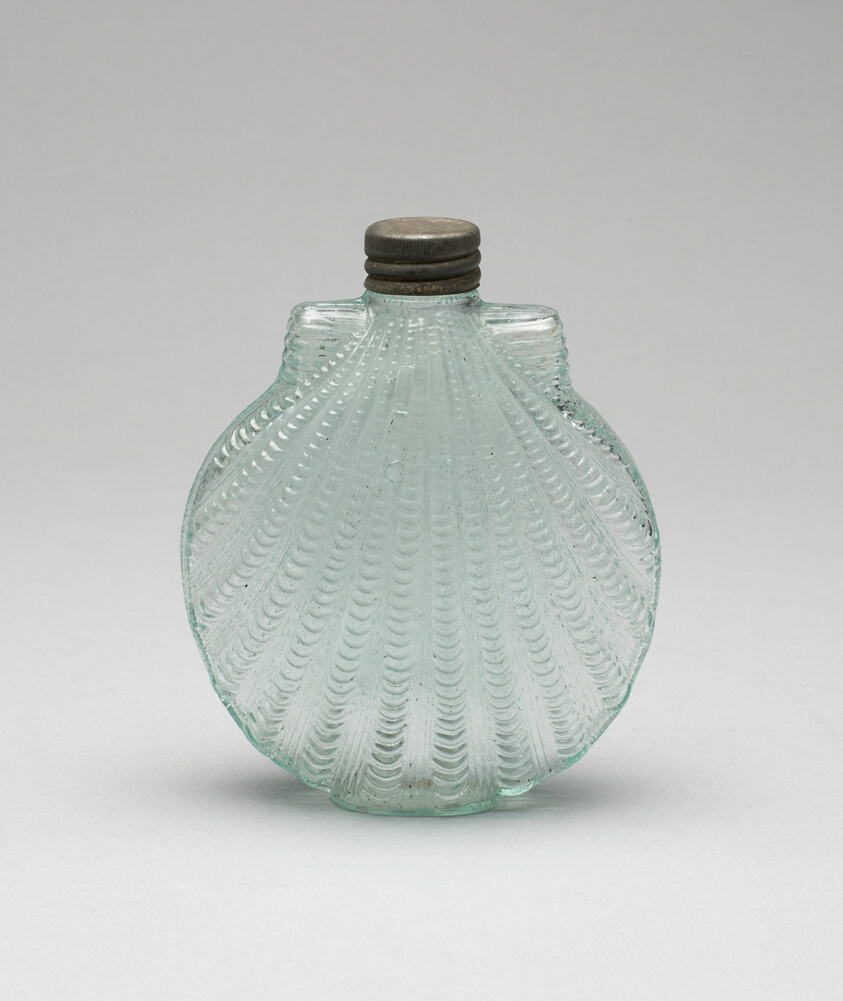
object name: Glass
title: Bottle or Flask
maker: Artist unknown (American, 19th century); Probably New York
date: c. 1890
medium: Glass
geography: New York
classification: flask (bottle); glass; american decorative arts; american arts; decorative arts